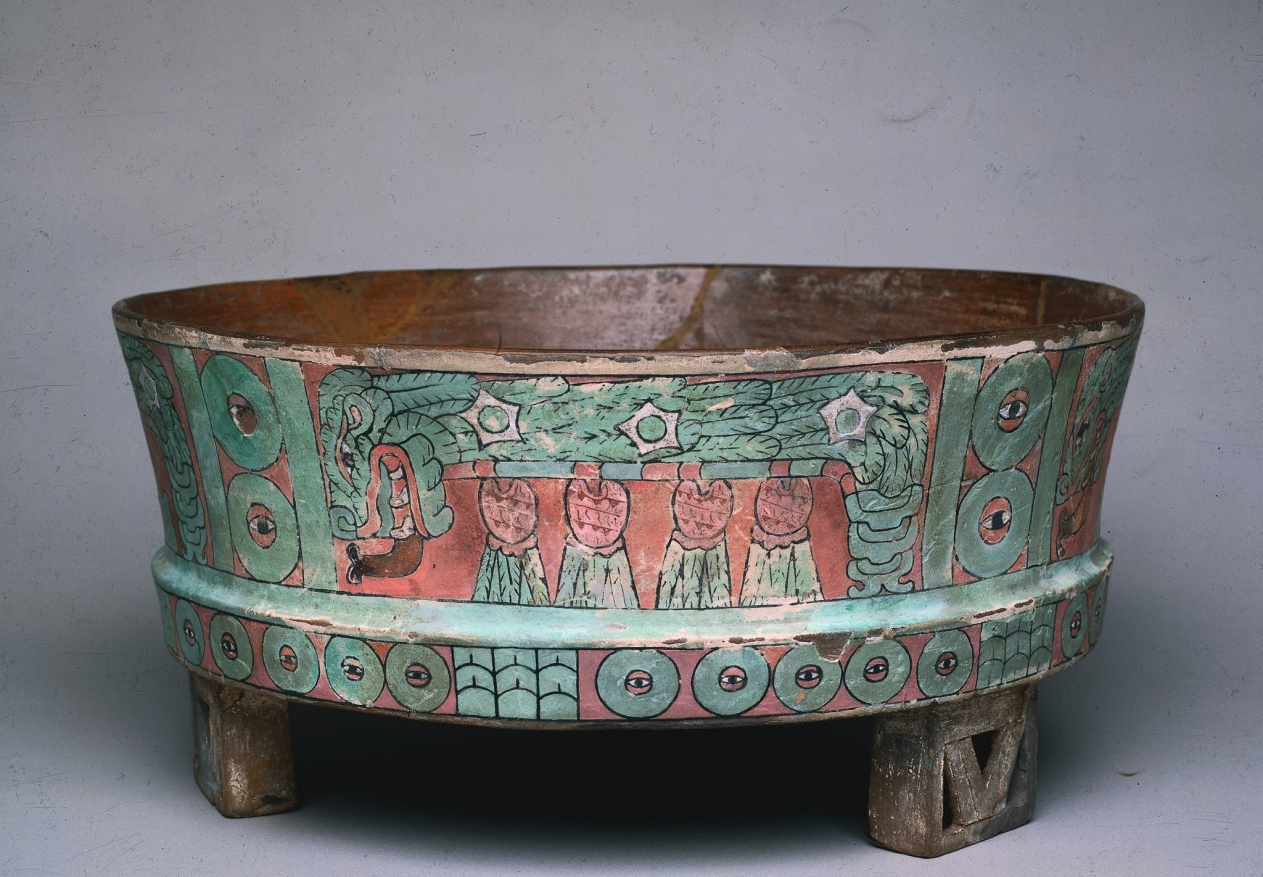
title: Basin with Feathered Serpent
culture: Central Mexico, Teotihuacán style, Classic period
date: 400–550 CE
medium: earthenware, stucco, pigment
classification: Ceramic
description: The serpent covered with the green feathers of the tropical quetzal bird is an image of verdant, bountiful nature and life. It also may be a symbol of rulership, thus linking rulers to cosmic forces and the natural order. Four human hearts lie beneath the serpent on this unusually large basin, suggesting that sacrifice stimulates nature’s fruitfulness.